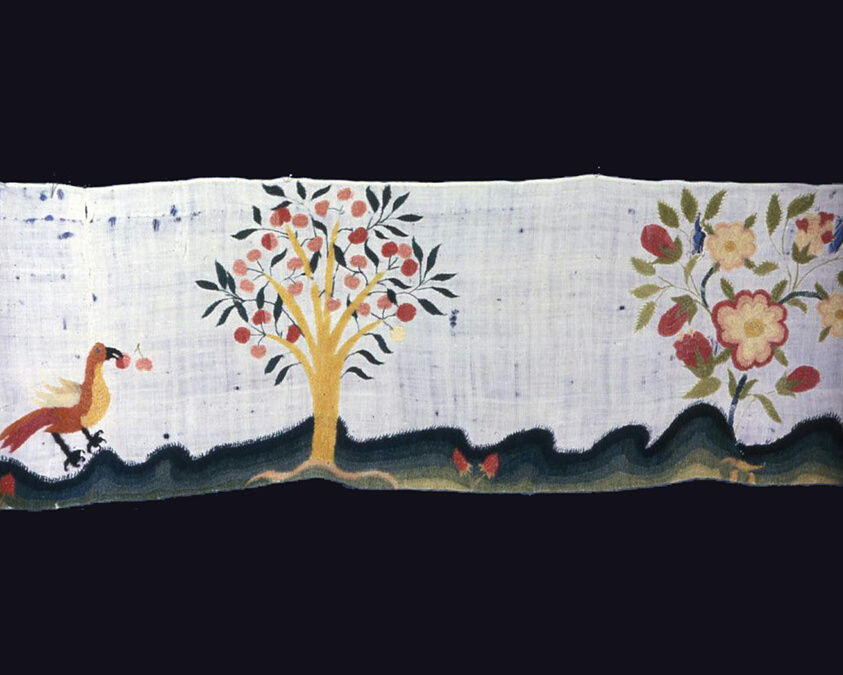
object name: Textile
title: Bed Curtain and Valance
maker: United States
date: 1750/1800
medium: Linen, plain weave; embroidered with wool yarn in bullion, long-armed cross, satin, and stem stiches; Roumanian and trellis couching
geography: United States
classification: textile; needlework (visual works)